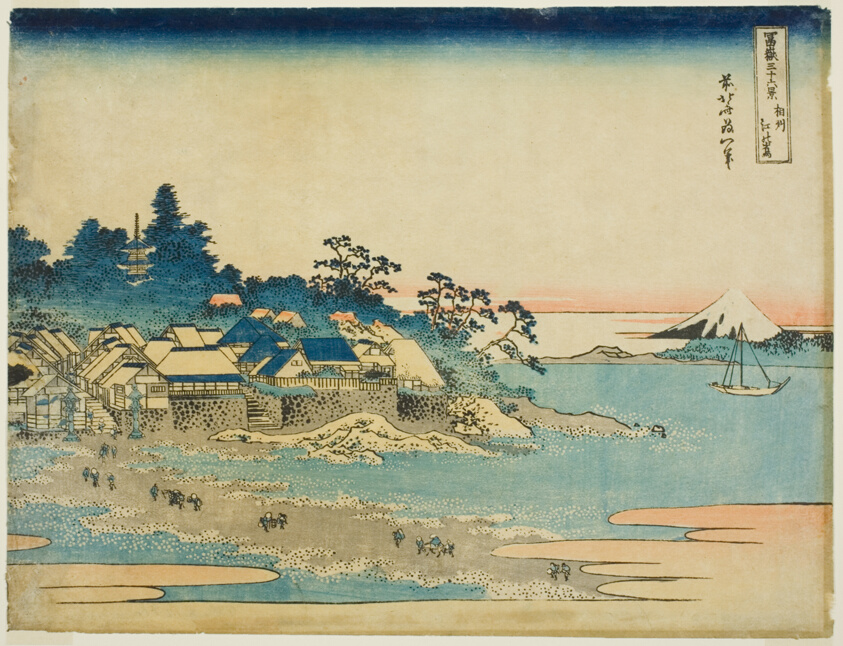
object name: Print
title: Enoshima in Sagami Province (Soshu Enoshima), from the series "Thirty-six Views of Mount Fuji (Fugaku sanjurokkei)"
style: Japanese (culture or style)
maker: Katsushika Hokusai 葛飾 北斎; Japanese, 1760-1849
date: c. 1830/33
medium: Color woodblock print; oban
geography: Japan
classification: woodblock print; print; asian art